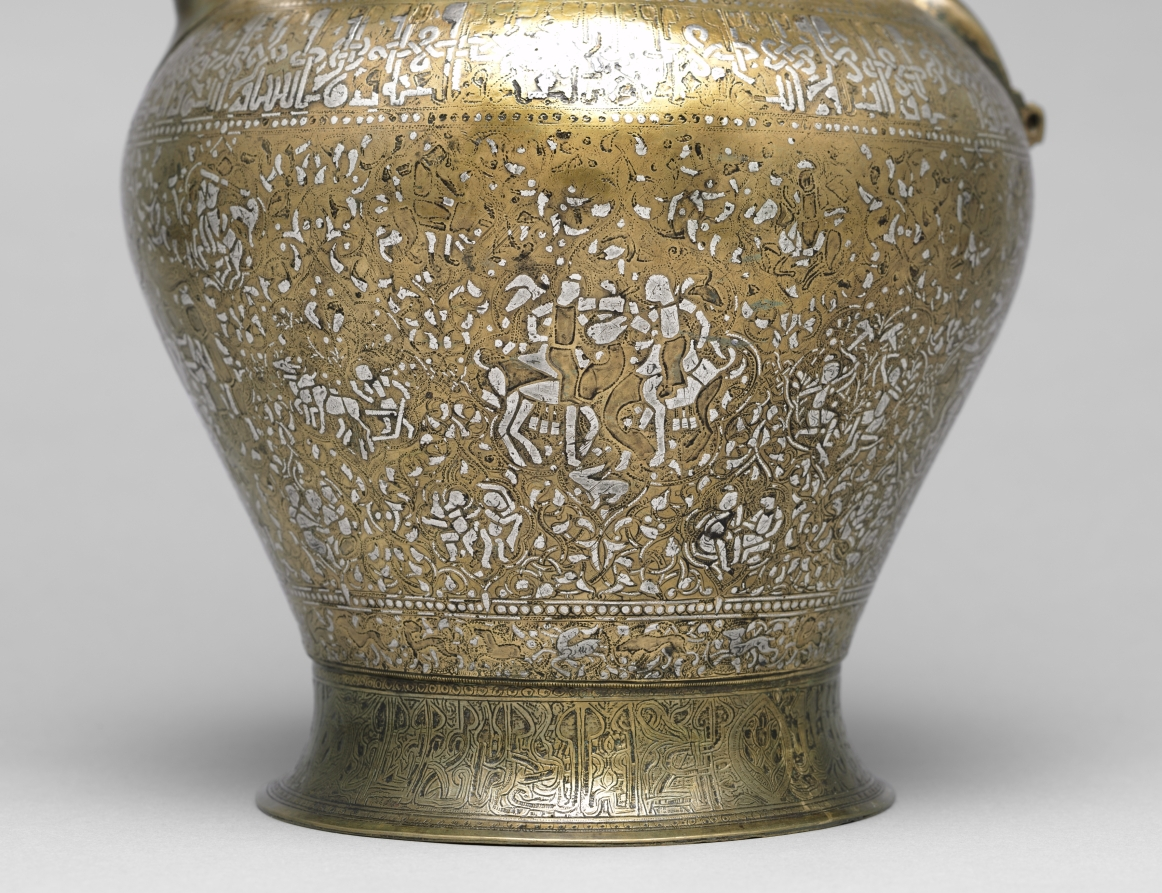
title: Luxury Ewer Extending Good Fortune to the Owner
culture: Iraq, possibly Mosul, Zangid or Artugid Period, 13th Century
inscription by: Ahmad al-Dhaki al-Mawsili (Iraqi, Mosul, active early 1200s?)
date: 1223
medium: brass inlaid with silver; lid and base added later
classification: Metalwork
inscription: Band on the neck (naskh): "Work of Ahmad al-Thaki, the engraver, al-Mawsili, in the year 620 and glory to my owner"; band at the base of the handle (naskh): "Work of Ahmad al-Thaki al-Mawsili"; graffiti of later owners, roughly scratched into the neck of the ewer: "Husayn ibn Qasim"; "Usta al-Muhtasib [?]"; band on the shoulder of the ewer (plaited, animated kufic): "Good luck, and learning, and commanding respect, and prosperity, and pride, and generosity, and faithfulness, and affection, and glory, and survival, and justice, and blessings, and exaltedness, and prosperity, and everlasting peace, and charitable giving."; band on the foot (naskh) [foot is a later addition]; this inscription has not yet been deciphered.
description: This silver inlaid ewer was produced for luxury clientele. The wide band around the body of the vessel displays vignettes of daily and courtly life contained within multilobed medallions. Some of the scenes feature falconry, hunting, dancing, and several groups of musicians. All these scenes are set off against a skillfully executed arabesque background—a pervasive motif in Islamic art characterized by interwoven vegetal and curvilinear elements. An inscription around the ewer’s shoulder extends good fortune, prosperity, and peace to the owner. The ewer is dated 1223 and signed by the master craftsman Ahmad al-Dhaki of Mosul.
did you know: Later owners roughly scratched their names into the neck of the ewer.